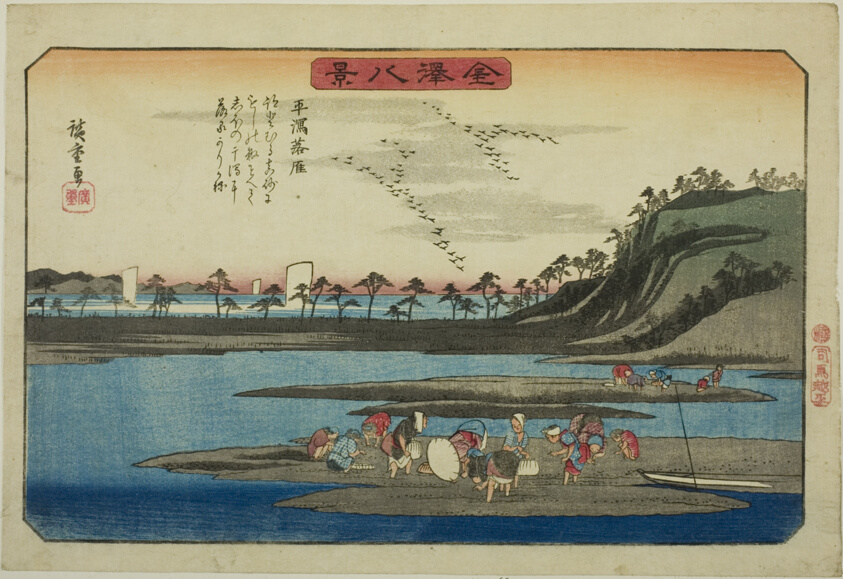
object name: Print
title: Descending Geese at Hirakata (Hirakata rakugan), from the series "Eight Views of Kanazawa (Kanazawa hakkei)"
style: Japanese (culture or style)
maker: Utagawa Hiroshige 歌川 広重; Japanese, 1797-1858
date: c. 1835/36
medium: Color woodblock print; oban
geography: Japan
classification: woodblock print; print; asian art